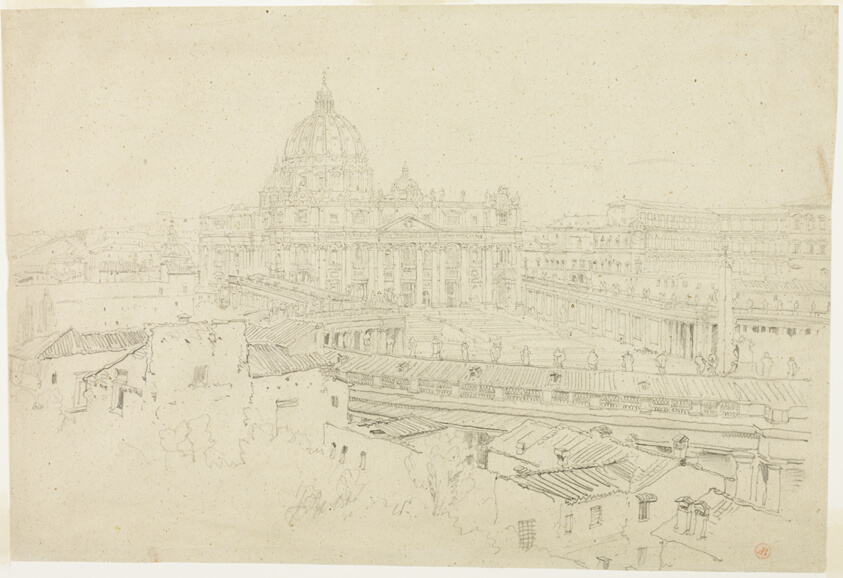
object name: Drawing and Watercolor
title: View of Saint Peter's in Rome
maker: Attributed to Jean–Auguste–Dominique Ingres; French, 1780–1867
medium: Graphite on buff wove paper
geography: France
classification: graphite; drawings (visual works); prints and drawing